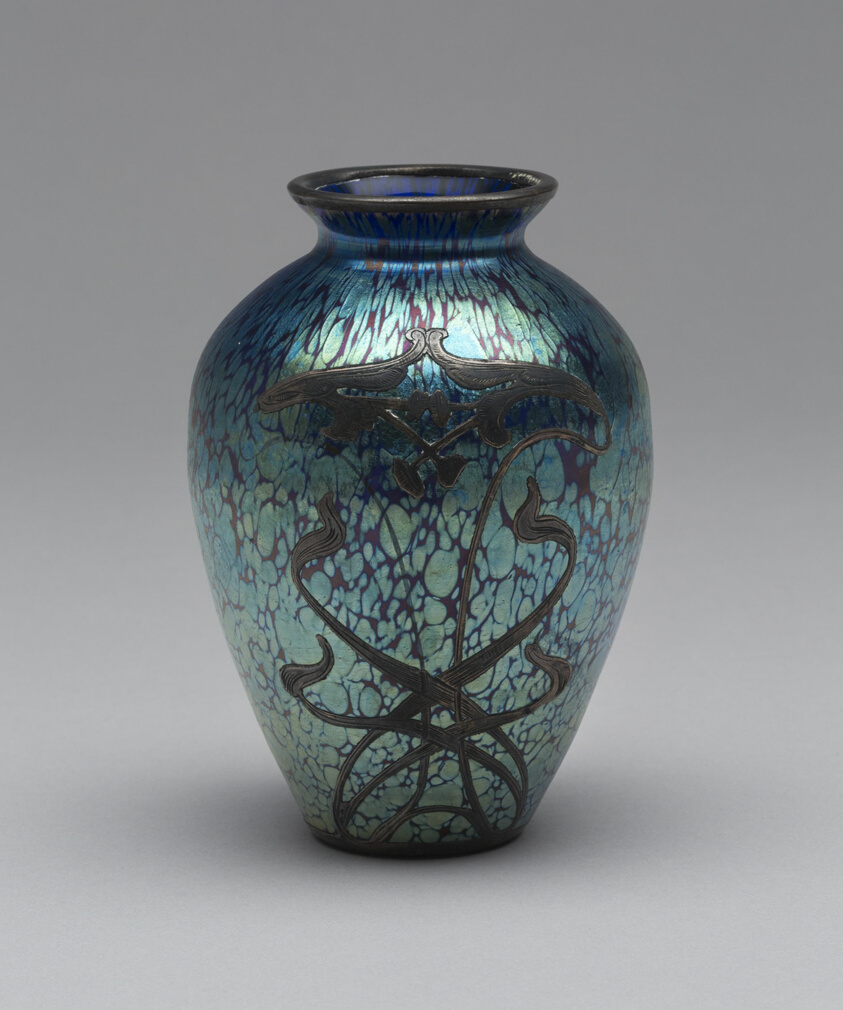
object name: Glass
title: Vase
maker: Decorated in America; c. 1900; Made by Loetz Glassworks; Present day Czech Republic, c. 1855–1947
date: c. 1900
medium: Glass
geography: Austria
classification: vase; glass; american decorative arts; american arts; decorative arts